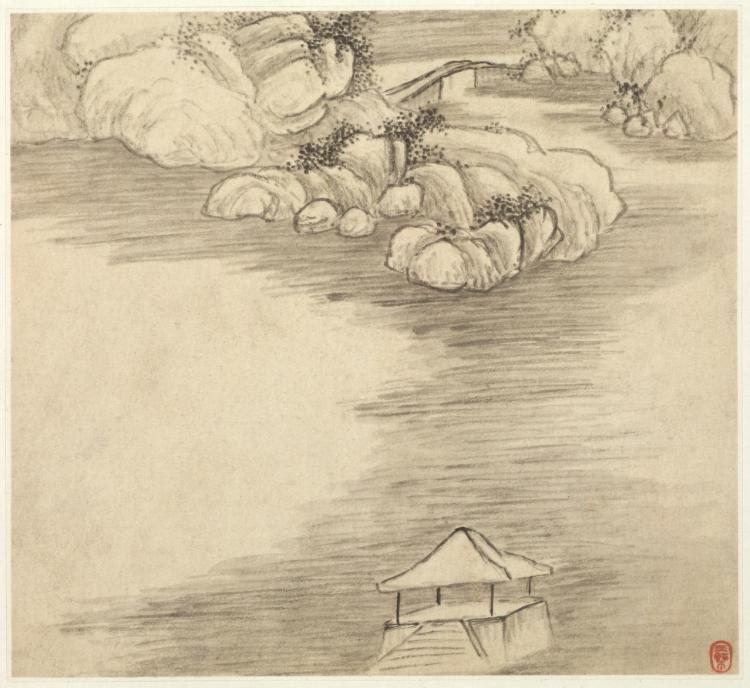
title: Album of Landscapes: Leaf 3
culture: China, Qing dynasty (1644-1911)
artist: Wang Gai (Chinese, active c. 1677–1705)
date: 1677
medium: album leaf, ink and light color on paper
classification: Painting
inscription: Poem by Li Lai-t'ai